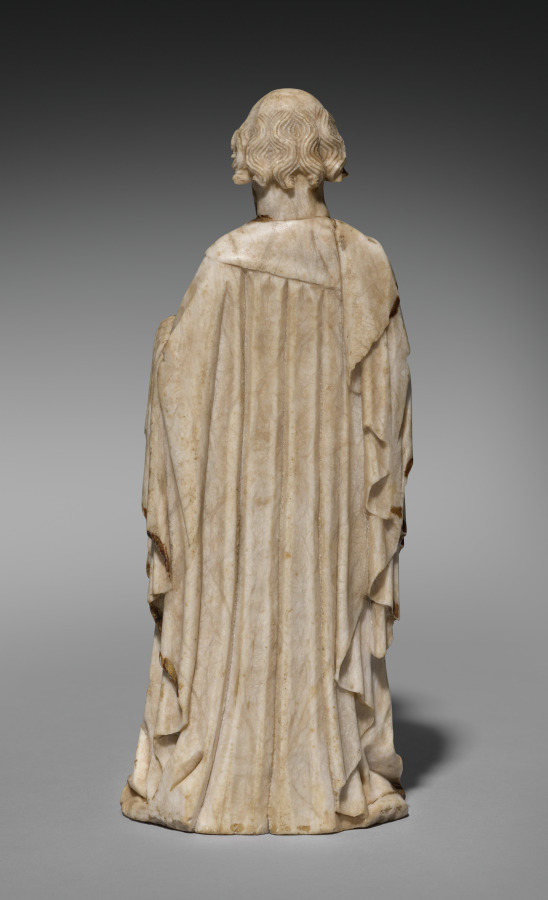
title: Standing Apostle (Saint Paul?)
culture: Southern Netherlands or Northern France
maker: Master of the Saint-Omer Apostles (Southern Netherlandish, active Bruges?)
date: c. 1430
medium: Alabaster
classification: Sculpture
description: This sculpture comes from an altarpiece in the cathedral of Saint Omer in northern France. Four other figures have been preserved there, and possibly one at the Metropolitan Museum in New York. The workshop was probably located in Bruges, in what is now Belgium. Sculpture was the leading art genre at that time. The specialized workshops obtained the stone alabaster from distant quarries, in this case from the area of Würzburg in Bavaria (Germany), to form it intricately and deliver it to customers in almost all of Europe.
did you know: Alabaster is very soft; after 20 minutes of treatment with water the surface will dissolve.